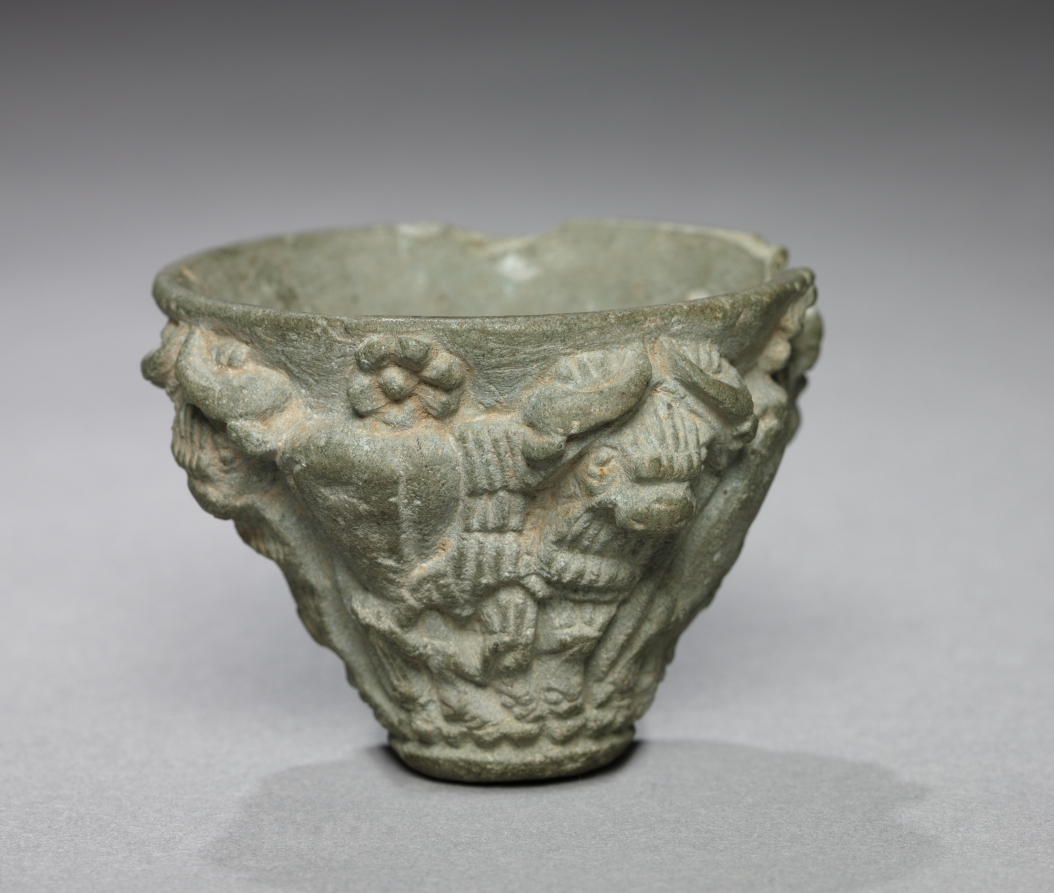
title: Bull Procession Cup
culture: Sumerian, Iraq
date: c. 3100–2900 BCE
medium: gray limestone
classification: Sculpture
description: It was believed that the person who drank from a cup like this magically gained the fertility of the bulls carved on its surface.